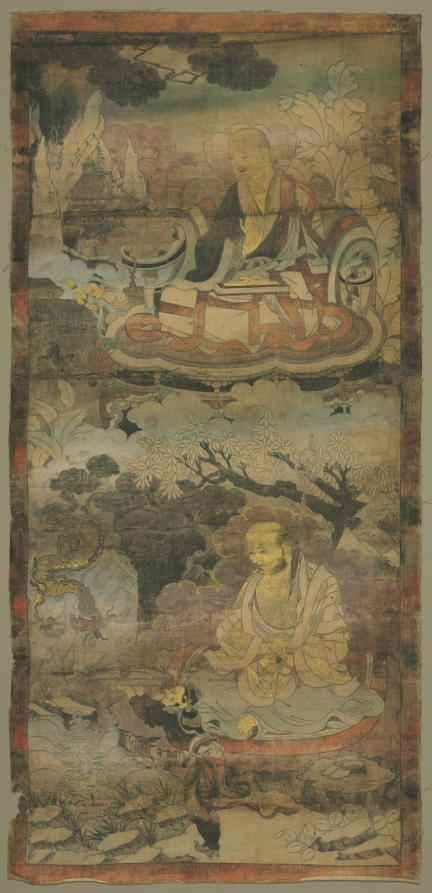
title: Lohans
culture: Sino-Tibetan, Yuan dynasty (1271-1368)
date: c. 1300–1350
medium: color and gold on cotton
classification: Painting